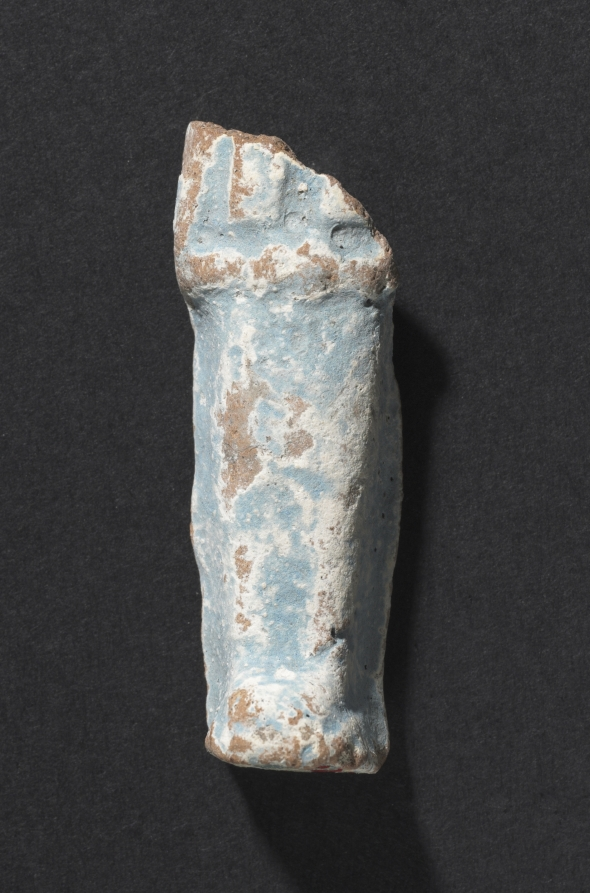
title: Shawabty of Ditamenpaankh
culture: Egypt, Late period (715–332 BCE), Dynasty 25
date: 715–656 BCE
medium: terracotta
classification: Funerary Equipment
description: High demand for shawabtys in the Late Period, a time when as many as 400 or more shawabtys were placed in the tomb with the deceased, gave rise to a specialized container for storing them: the shawabty box. This example is inscribed for the lady of the house, Ditamenpaankh, and was probably one of a pair originally made for her. The single-masted boat on the box's lid is perhaps an allusion to the pilgrimage of the deceased to the holy city of Abydos, the cult city of Osiris, king of the dead. The shawabtys inside are crude, mass-produced examples cast in an open mold. Made of terracotta, their blue paint imitates more costly shawabtys made of faience. As for the shawabty spell, it has been removed from its traditional location on the shawabty's front and relocated onto the sides of box, where it needed only to be written once, thus expediting production.